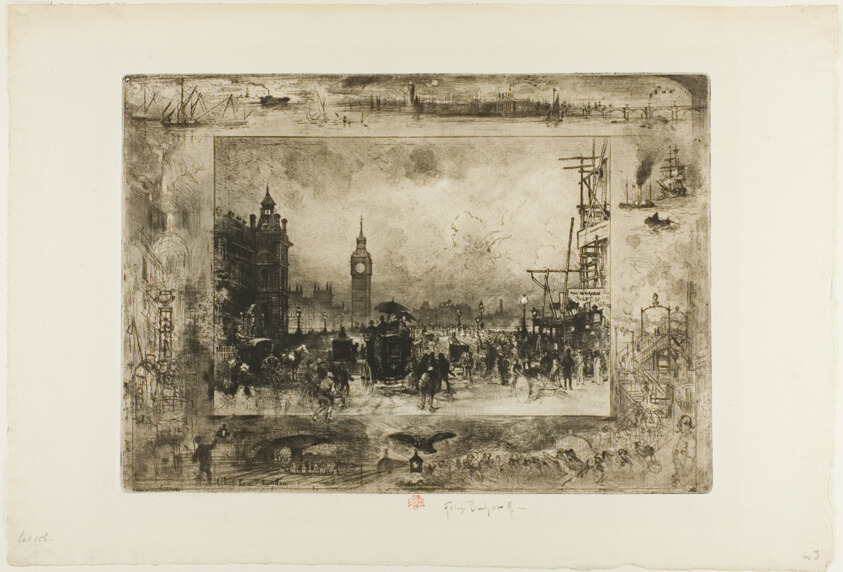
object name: Print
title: Westminster Clock Tower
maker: Félix Hilaire Buhot (French, 1847-1898)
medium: Etching, drypoint, roulette and aquatint on ivory laid paper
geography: France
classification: etching; print; prints and drawing